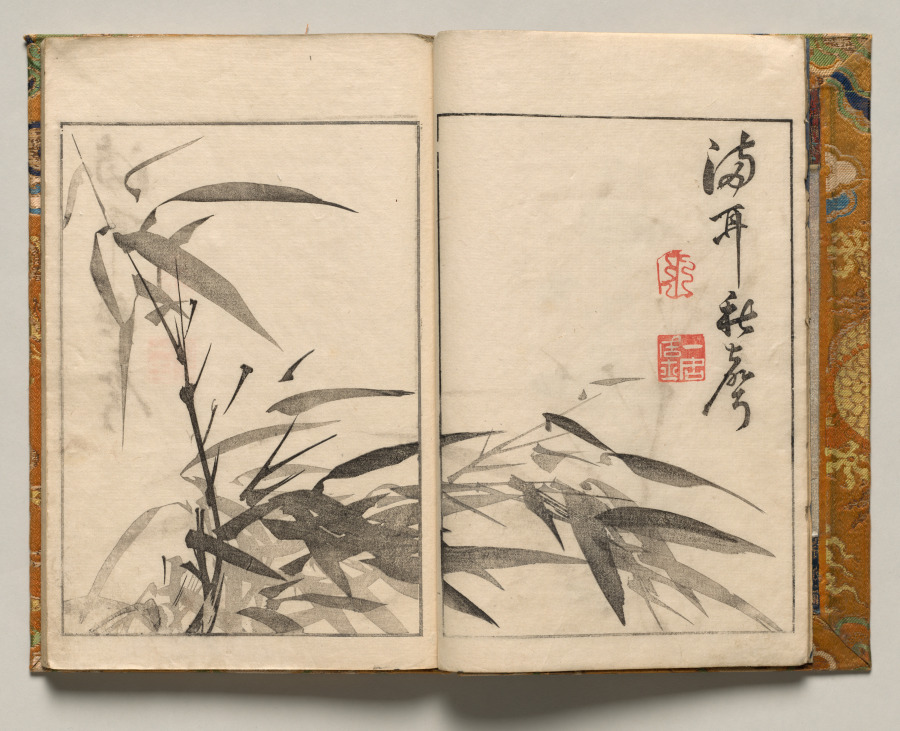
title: Bamboo, Design One from Shazanrō Picture Book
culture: Japan, Edo period (1615–1868)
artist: Tani Bunchō (Japanese, 1763–1841)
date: 1816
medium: Woodblock-printed book; ink and color on paper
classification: Bound Volume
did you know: Shazanrō was one of Tani Bunchō's style names.